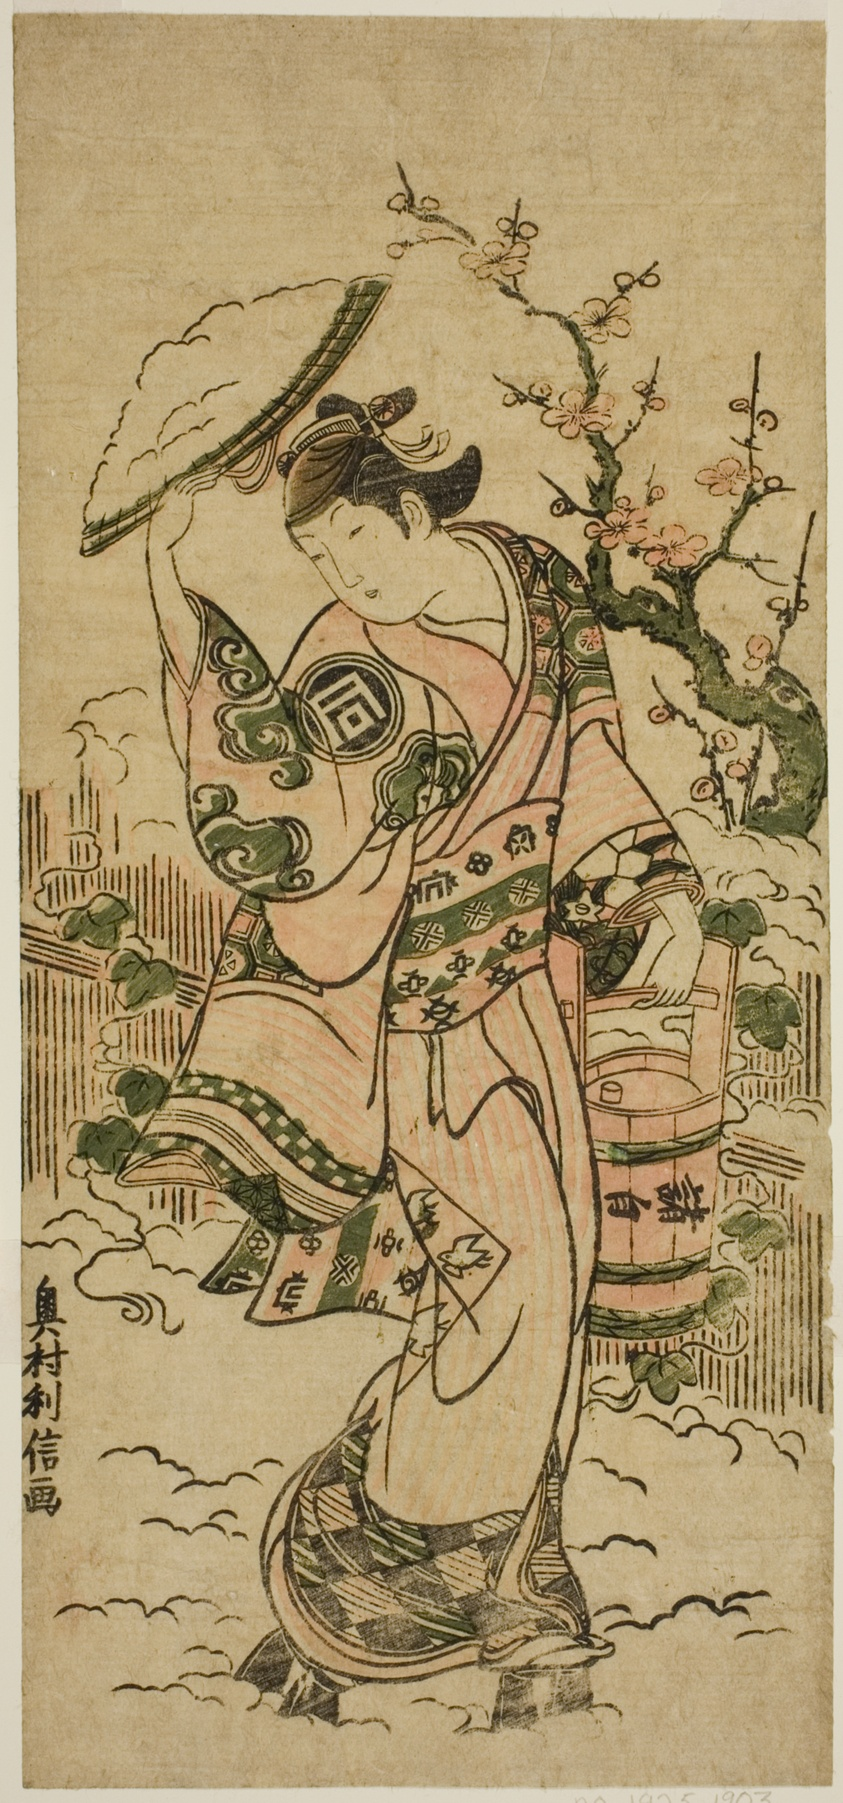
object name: Print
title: The Actor Sanogawa Mangiku as a woman walking in the snow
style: Japanese (culture or style)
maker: Okumura Toshinobu (Japanese, active c. 1717-50)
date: c. 1742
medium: Color woodblock print; hosoban, benizuri-e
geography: Japan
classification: painting; asian art; print